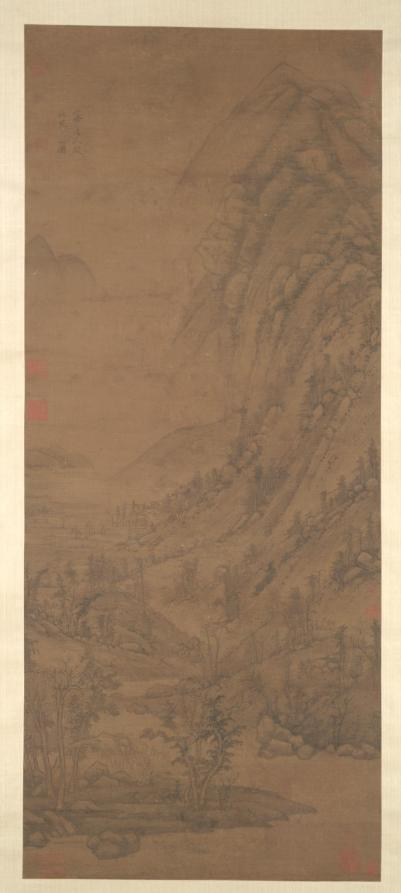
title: Summer Mountains (after Dong Yuan [active c. 937–75])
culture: China, Yuan dynasty (1271-1368)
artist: attributed to Huang Gongwang (Chinese, 1269–1354)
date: 1290–1354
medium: hanging scroll; ink and slight color on silk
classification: Painting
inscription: 【印】一峰道人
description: This monumental landscape is drawn in softly rounded strokes with darker lines frequently applied on top of lighter ones. This technique recalls one of the suggestions included in a collection of the artist's writings known as Secrets of Landscape Painting: The most difficult thing in painting is using the ink. The artist begins by using dilute ink and builds it up to the point where it begins to look right, then uses dense, black ink, applied fairly dry, and washes of deeper-toned ink. This technique distinguishes the fields from the paths, the far from the near. Huang Gongwang may have learned this technique from observing nature through the eyes of an earlier master, Dong Yuan, a painter whose style he shared.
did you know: The wet hills and moist, rich atmosphere evoke the southern Chinese summer, characterized by monsoon rains and lush growth.